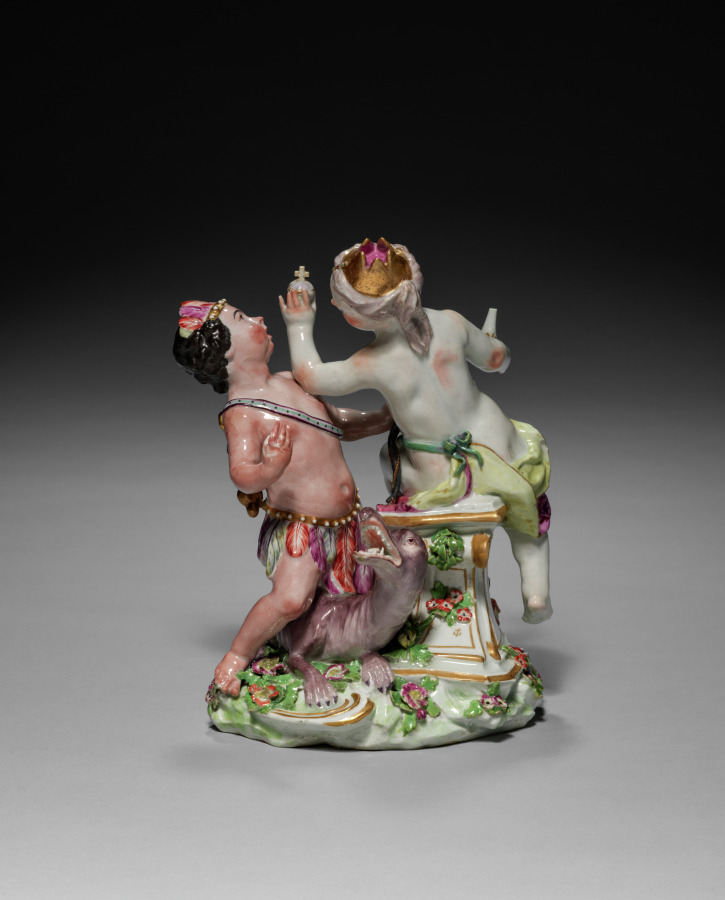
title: Figure of Europe and America from the Four Continents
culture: England, Chelsea, mid-18th century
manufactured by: Chelsea Porcelain Factory (Britain, London, 1745–84)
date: c. 1760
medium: soft-paste porcelain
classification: Ceramic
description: Often collected by wealthy British merchants who were beneficiaries of colonial expansion, figural groups were frequently part of elaborate table decorations meant to signify wealth and global dominance. Here, Europe is seen holding an orb and wearing a crown as queen of the world, suggesting Europe’s supremacy over the other continents. She is entangled with America, who is wearing feathers with a bow and arrow at her feet. This depiction of America reveals a purely imagined understanding of faraway places.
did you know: Figural representations of the four continents date back to the 1500s, but such imagery became even more popular in the 1700s as European empires expanded.